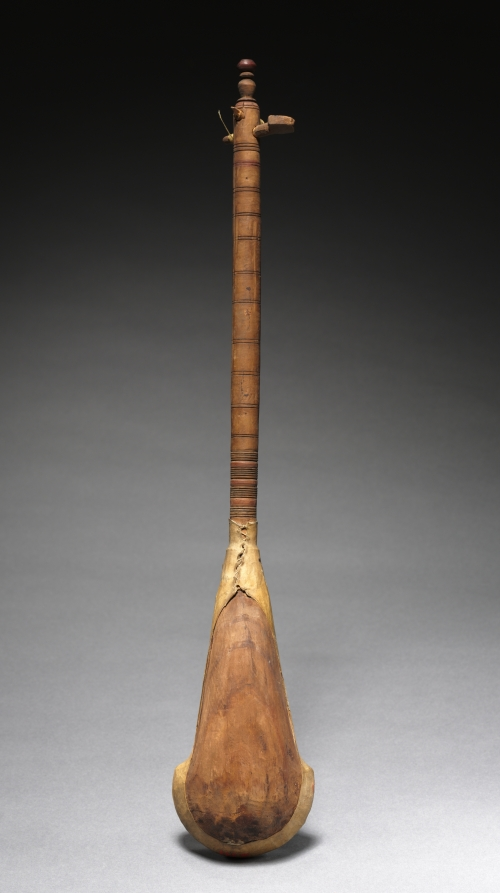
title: Gimbri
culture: Africa, unknown maker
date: 1900s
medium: Wood, rawhide, and string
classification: Musical Instrument